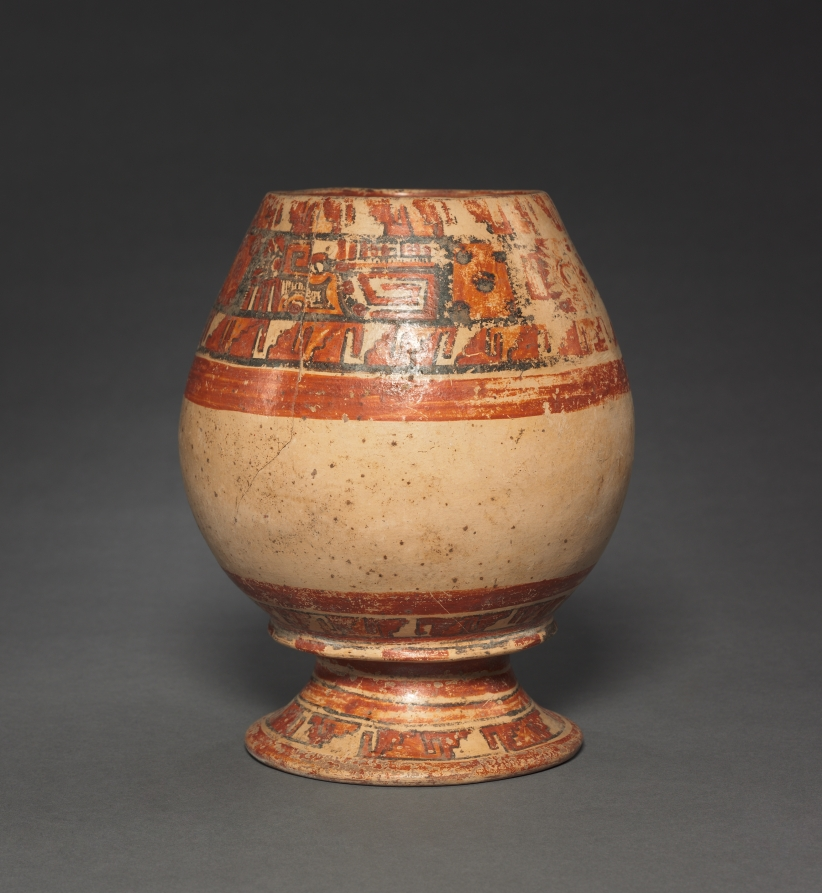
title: Vase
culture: Costa Rica, Filadelphia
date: 1000–1550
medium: earthenware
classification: Ceramic